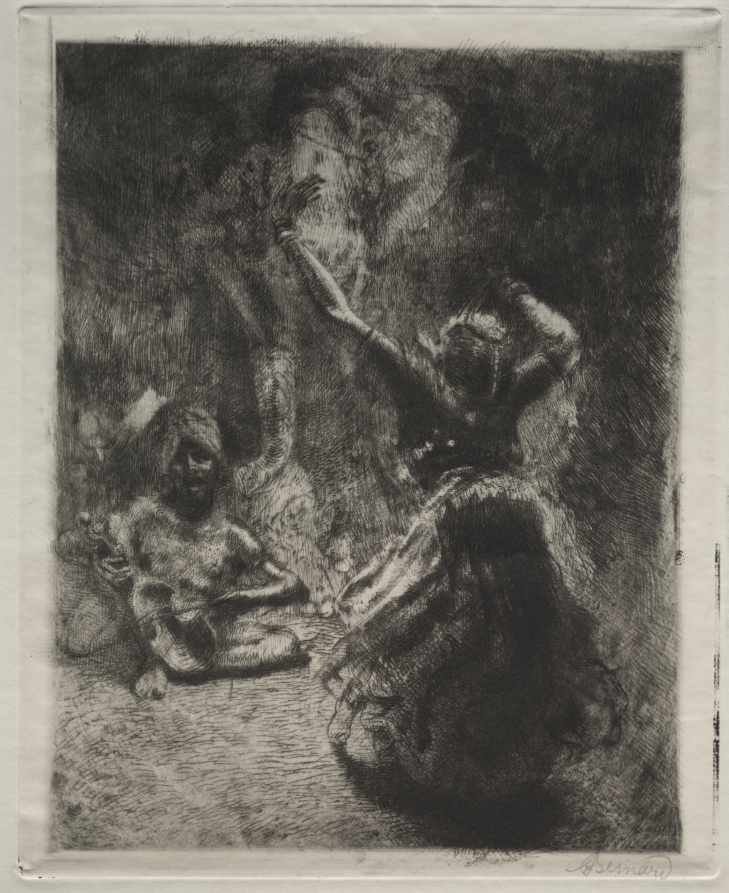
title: The Dancer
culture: France, 19th-20th Century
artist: Albert Besnard (French, 1849–1934)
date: circa 1900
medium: etching and drypoint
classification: Print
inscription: signed, lower right, in graphite: A Besnard